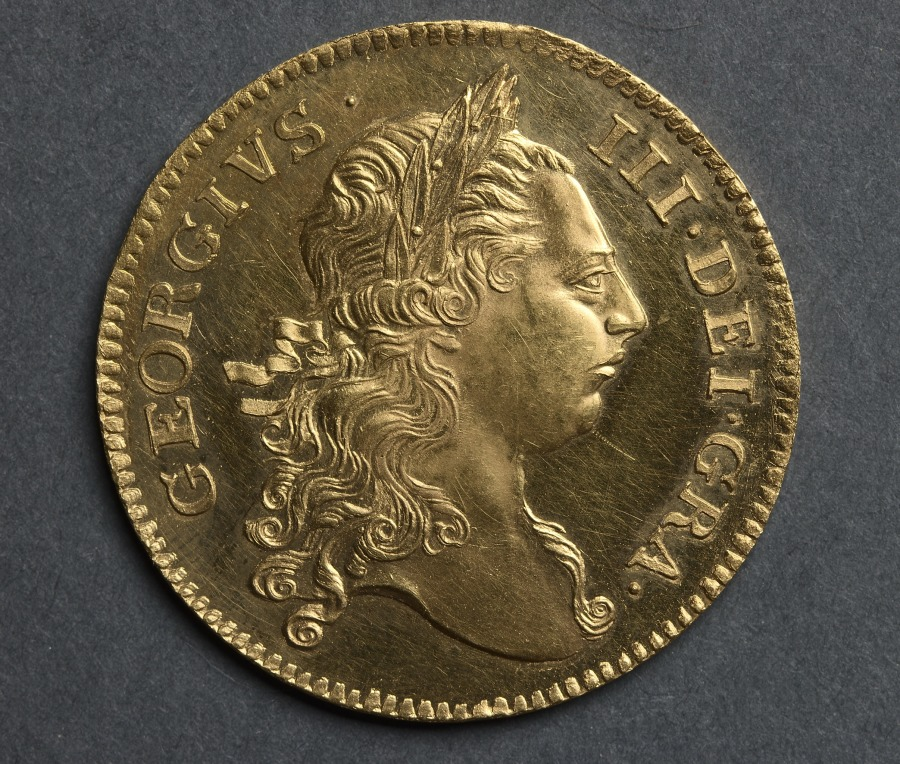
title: Two Guinea Piece: George III (obverse); Shield of Arms (reverse)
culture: England, George III, 1760-1820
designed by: John Sigismund Tanner (British, 1705–1775)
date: 1773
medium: gold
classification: Coins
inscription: DEI . GRA . GEORGIVS . III .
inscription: M B F ET H REX F D B ET L D S R I A T ET 1773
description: This very rare piece is another example of the fine patterns being produced at this period. With the coming reform of the coinage, the five- and two-guinea pieces do not appear again for general circulation. John Sigismund Tanner came to England in 1728, was appointed chief engraver in 1741 and died in 1775. He was responsible for a large number of pattern coins and for most of the second "old head" type of currency coins issued during the reign of George II.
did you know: The year this coin was minted, colonists in Boston raided three British ships throwing several hundred chests of tea into the harbor.